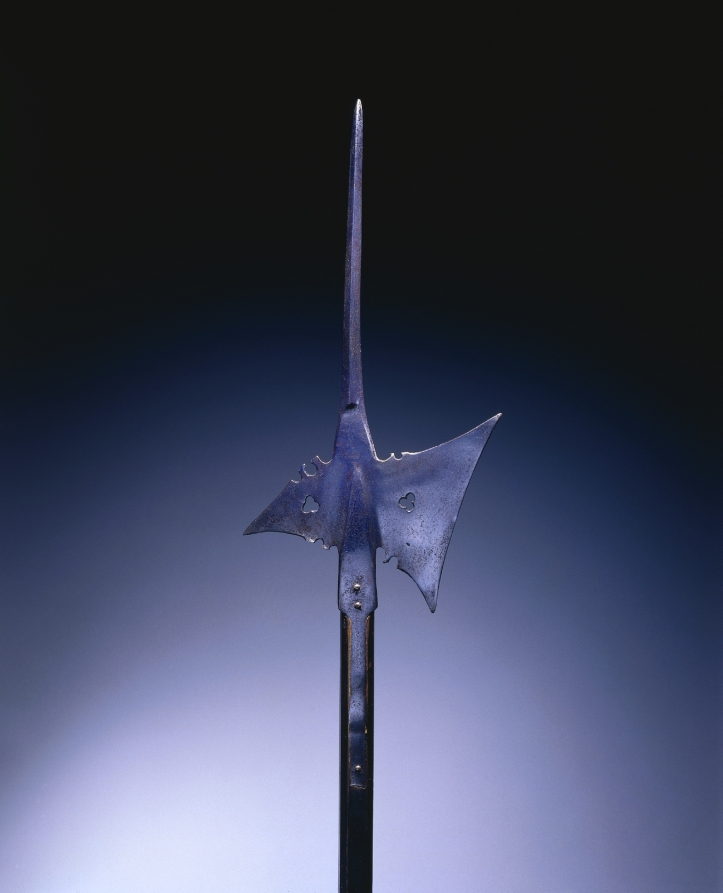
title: Halberd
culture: Germany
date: c. 1550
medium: steel, with pierced trefoils; wood haft (rectangular with planed corners)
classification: Arms and Armor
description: The most effecient weapons used by the infantry (foot soldiers) during the 15th and 16th centuries were pole arms (or staff weapons). The halberd, like the examples shown here, was a weapon of great versatility. The word halberd comes from the German words Halm (a staff) and Barte (an axe). The halberd is, in fact, an axe mounted on a long pole with a very specialized shape and function: the axe blade was used for hacking, the spike for thrusting, and the beak either for piercing plate armor or for pulling a knight from his saddle. Used by shock troops, the halberd was the weapon of choice for Swiss and German mercenaries. From about 1550 onward, the halberd underwent major changes. Its distinctive outline became exaggerated and its functional elements evolved into purely ornamental shapes. The halberd's large blade conveniently provided space for armorial devices. By the late 1500s, it became a ceremonial weapon favored by princely body guards. It is still carried today by the Swiss Guard at the Vatican.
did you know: The lives of both Leopold III, Duke of Austria, and Charles the Bold, Duke of Burgundy, were ended by a halberd strike.